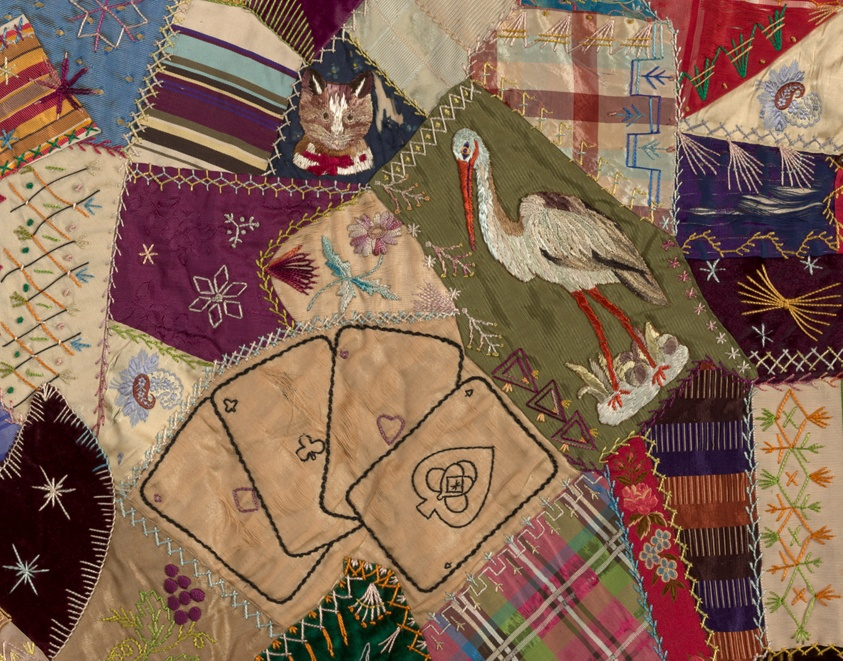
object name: Textile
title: Parlor Throw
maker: American, possibly Illinois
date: c. 1890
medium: Pieced, embroidered and painted “crazy” quilt; dyed and printed silk plain, satin, pile and patterned weave fabrics and ribbons; silk and metallic embroidery threads; paint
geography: Illinois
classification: needlework - quilt; textile